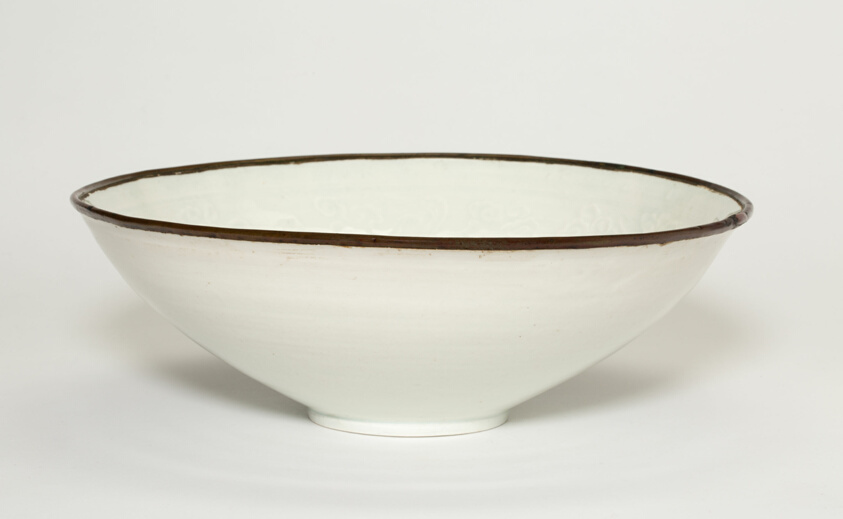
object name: Vessel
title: Bowl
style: ding, Chinese (culture or style), East Asian, asian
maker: China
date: Ming dynasty (1368–1644) or later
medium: with rim bound with metal. Decoration molded in relief; 6 cranes in various positions on sides, with fungus? or cloud forms about their heads, flower spray. Ting or qingbai Yao. Translucent white porcelain; pale bluish glaze (with small bubbles). Bowl with gently rounding sides, very slightly flaring rim bound with metal. Translucent white porcelain, apparently burned tan where exposed. Twice glazed, apparently; very pale bluish glaze with small bubbles, covers surface, except mouthrim. Decoration molded in relief: 6 craned in various positions on sides, with propitious fungus (?) or cloud forms about their heads and feet; in bottom of bowl, flower spray; incised band inside rim.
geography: China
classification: porcelain; asian art; ceramics